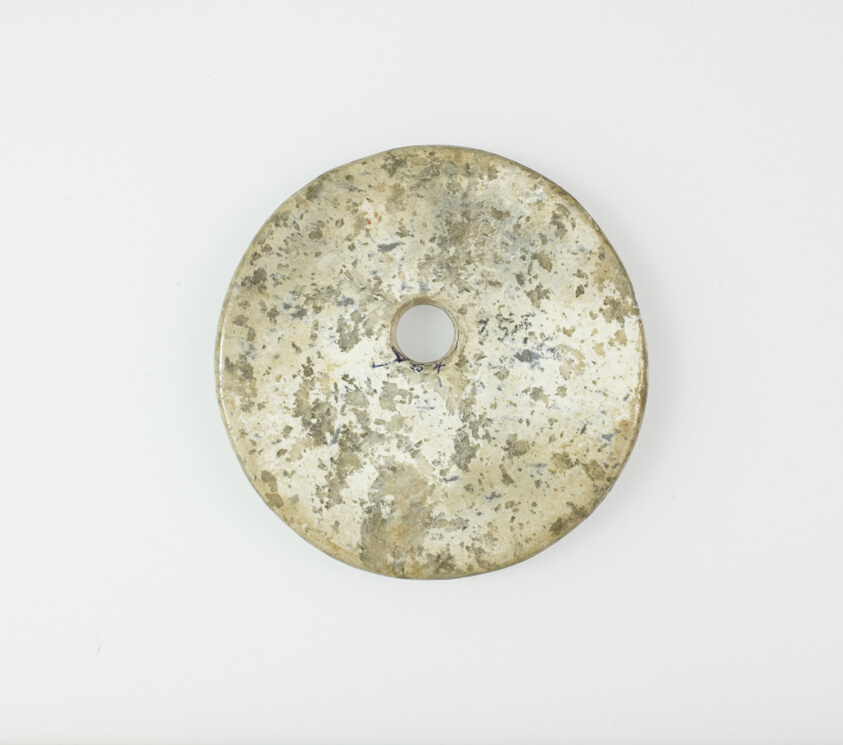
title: Disc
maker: China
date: Shang dynasty (c.1600–1050 BC)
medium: Jade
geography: China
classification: jade; asian art